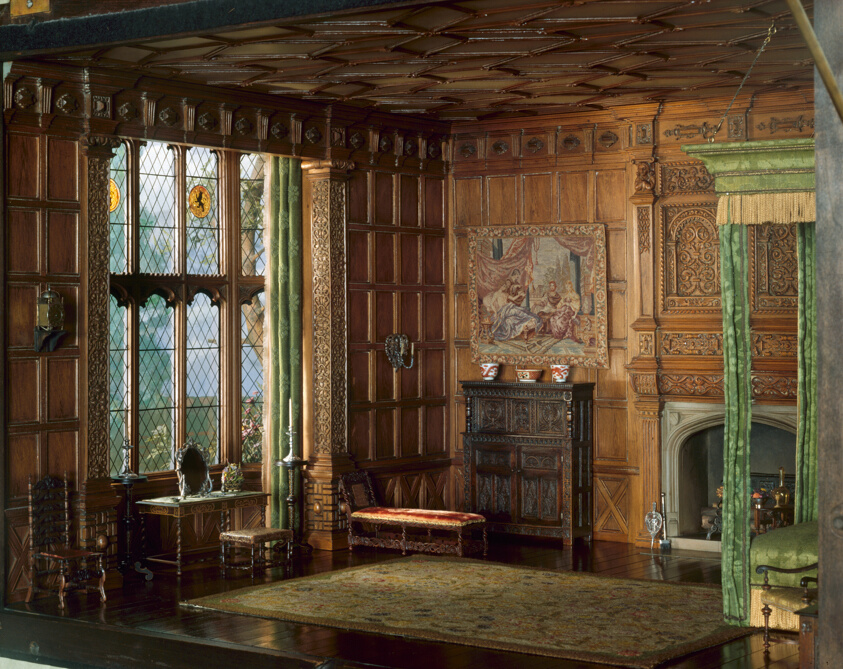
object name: Miniature room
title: E-2: English Bedchamber of the Jacobean or Stuart Period, 1603-88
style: stuart, european, jacobean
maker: Designed by Narcissa Niblack Thorne; American, 1882-1966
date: c. 1937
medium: Miniature room, mixed media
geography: United States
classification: miniature; thorne rooms